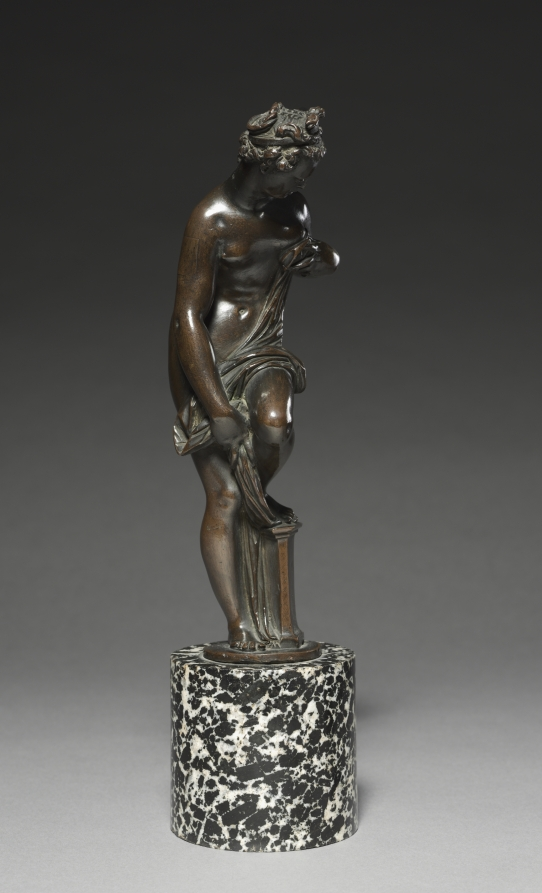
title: Venus after the Bath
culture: Italy, early 17th century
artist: cast possibly by the Workshop of Giambologna (Flemish, active Italy, 1529–1608)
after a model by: Giambologna (Flemish, active Italy, 1529–1608)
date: c. 1600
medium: bronze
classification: Sculpture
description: The statuette’s scale speaks to its likely place in private, intimate settings. The serpentine composition would have encouraged close examination from multiple angles. Compare the complexity of her pose to the relatively static Venus with a Burning Urn (1948.171).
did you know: Giambologna intended his bronze statuettes to be held and touched, to fully appreciate their smooth, elegant forms.